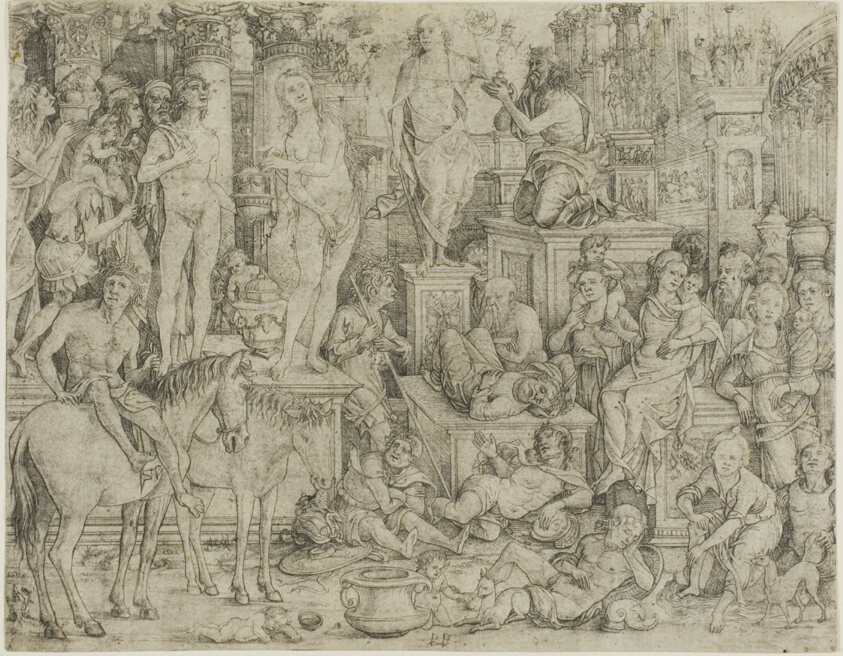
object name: Print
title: Triumph of the Moon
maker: Monogrammist P.P. (Italian, late 15th-early 16th century)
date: 1500/10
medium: Engraving on cream laid paper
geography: Italy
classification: engraving; print; prints and drawing